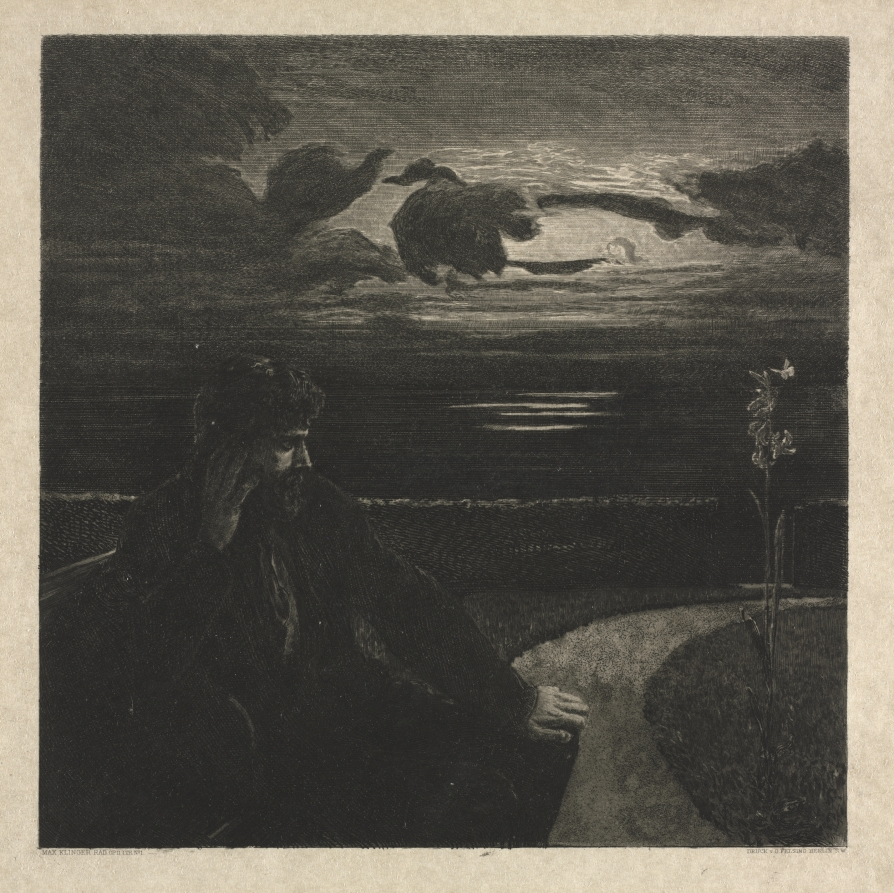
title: Night, from On Death, Part I, Opus XI (Nacht, Vom Tode, Erster Teil, Opus XI)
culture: Germany, late 19th century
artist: Max Klinger (German, 1857–1920)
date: 1889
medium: etching and aquatint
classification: Print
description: In On Death, Part One, a series of ten etchings, the Symbolist Klinger envisioned the ephemeral nature of life and the suddenness of death, themes that prompted one contemporary critic to call the portfolio a modern "Dance of Death." In Night, the first in the series, a man sits on a bench in an enclosed garden. A moonbeam breaks through the clouds over the sea, and on the path to the right is a lily with a fluttering butterfly. The landscape seems an extension of the figure’s melancholy thoughts, a landscape of the mind.